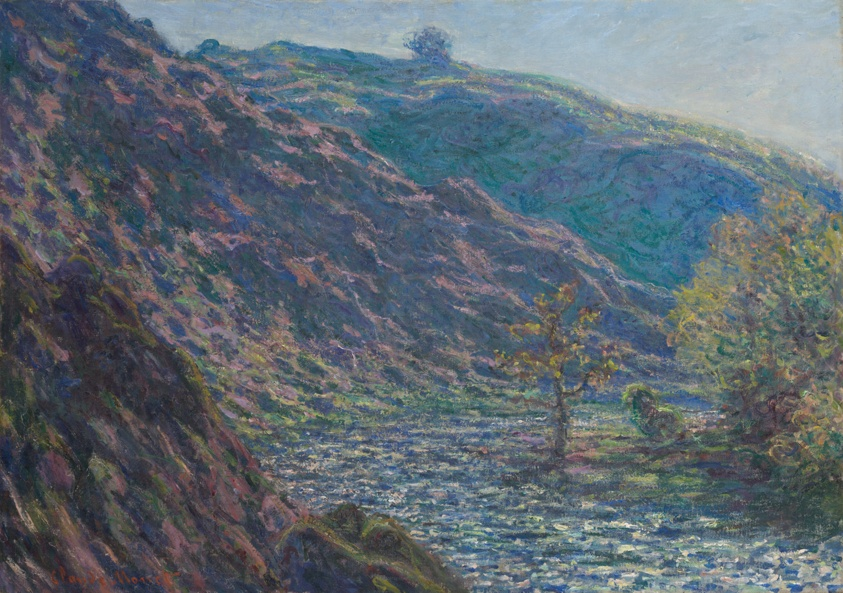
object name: Painting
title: The Petite Creuse River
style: Impressionism, nineteenth century, 19th century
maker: Claude Monet (French, 1840–1926)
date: 1889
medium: Oil on canvas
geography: France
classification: painting; paint; oil paintings (visual works); oil on canvas; french; european painting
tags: landscapes, river, France, mountain, mountains, trees, summer, weather/seasons, water, Century of Progress, world's fairs, Chicago World's Fairs